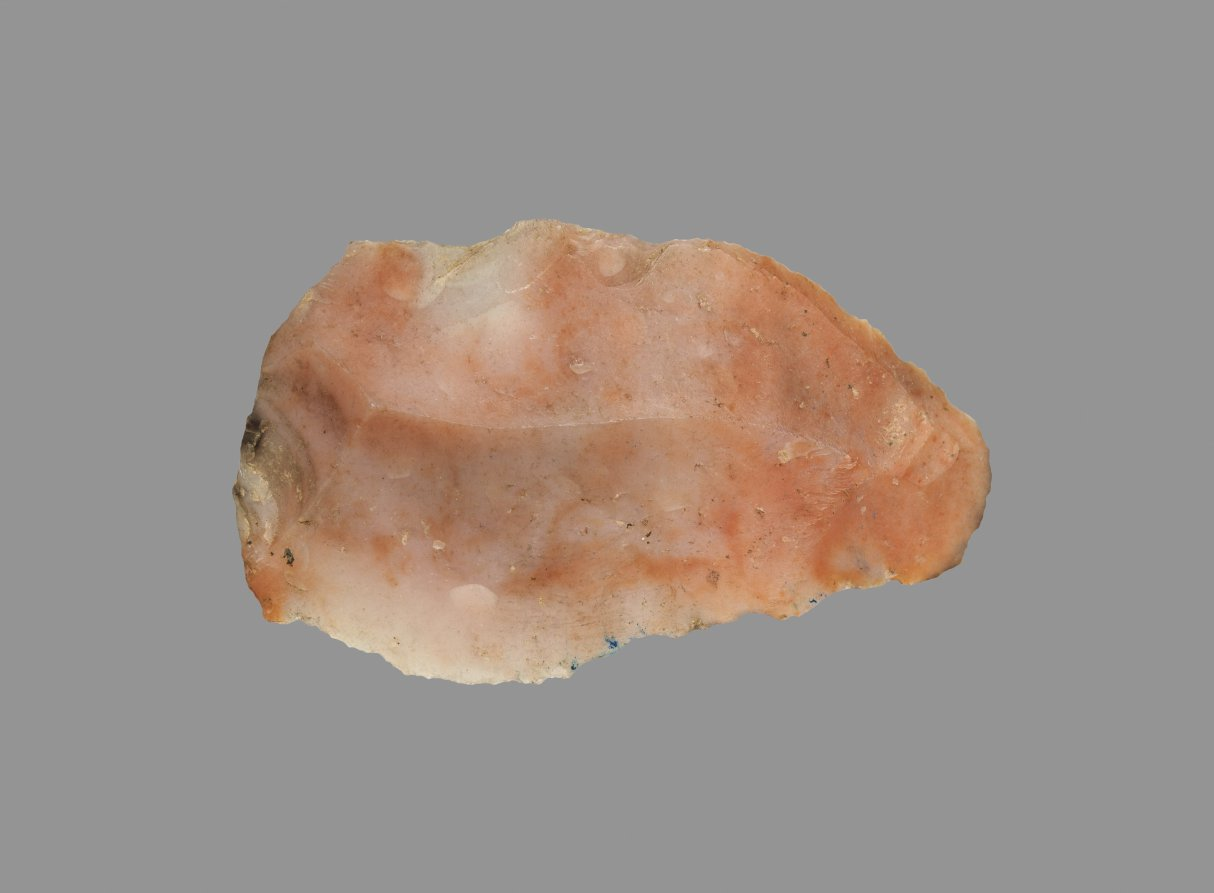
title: Sickle Blade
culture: Egypt, Middle Kingdom (2040–1648 BCE), Dynasty 12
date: 1980–1801 BCE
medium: flint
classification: Implements